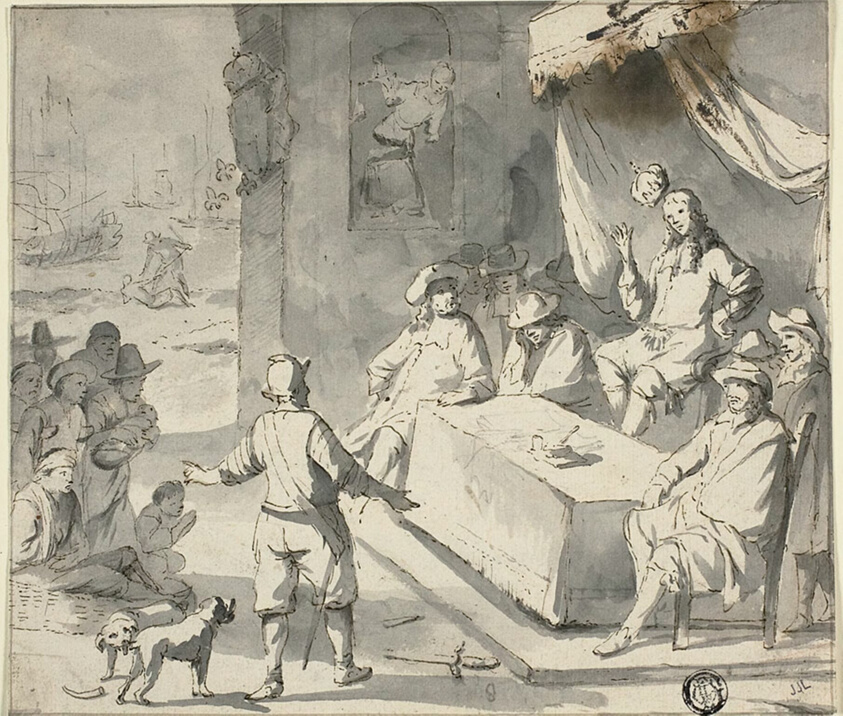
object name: Drawing and Watercolor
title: Scene from Dutch History: Supplicants before Ruler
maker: Romeyn de Hooghe (Dutch, 1645-1708)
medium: Pen and brown ink, with brush and gray wash, over graphite and traces of white chalk, on ivory laid paper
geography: Holland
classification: ink or chalk wash; drawings (visual works); prints and drawing